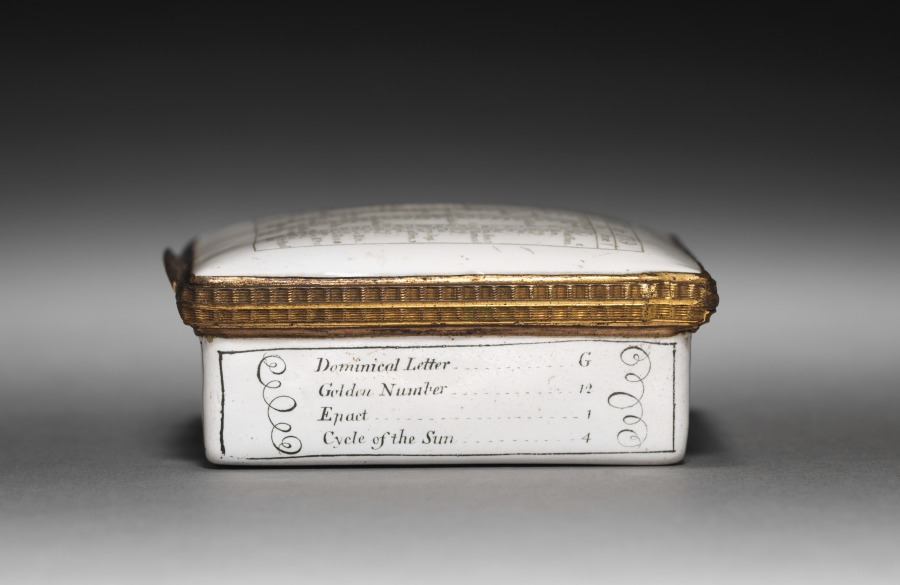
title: Snuff Box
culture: England, Birmingham, mid-18th Century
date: 1759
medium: enamel on copper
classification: Enamel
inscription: Dated: "1759"